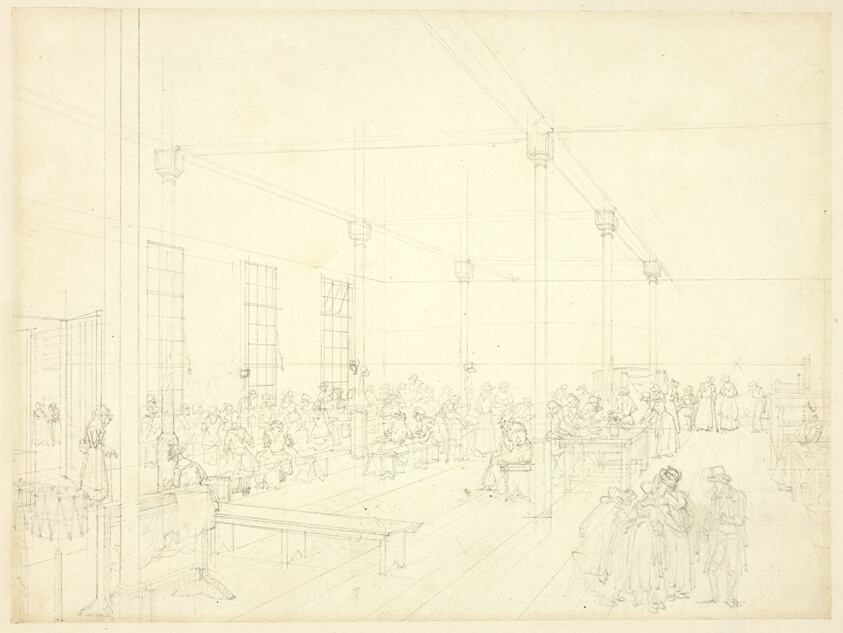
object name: Drawing and Watercolor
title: Study for Workhouse, St. James' Parish, from Microcosm of London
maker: Augustus Charles Pugin (English, born France, 1762-1832); Thomas Rowlandson (English, 1756-1827)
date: c. 1809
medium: Graphite on cream wove paper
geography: England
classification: graphite; drawings (visual works); prints and drawing